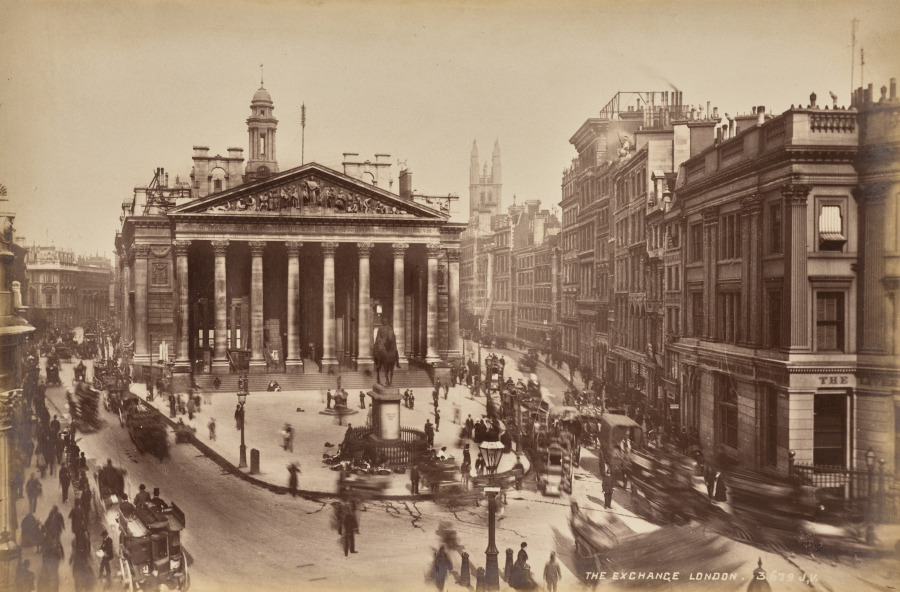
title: The Exchange, London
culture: England, 19th century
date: c. 1880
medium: albumen print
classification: Photograph